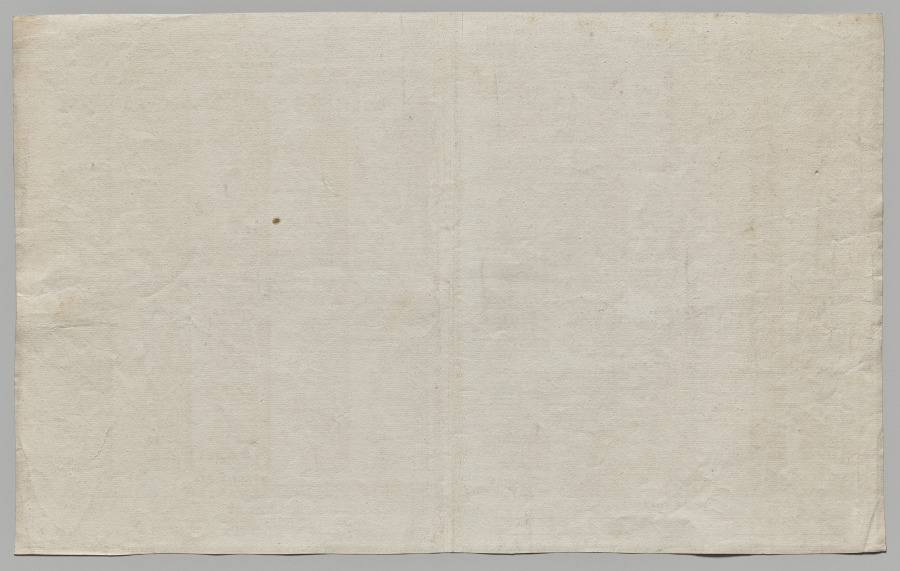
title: Nuova pianta di Roma data in luce da Giambattista Nolli l’anno MDCCXLVII, known as La Pianta Grande di Roma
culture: Italy, 18th century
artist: Giovanni Battista Nolli (Italian, 1701–1756)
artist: Carlo Nolli (Italian, 1690–1790)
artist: Rocco Pozzi (Italian, 1701–1774)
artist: Pietro Campana de Soriano (Italian, 1725–c. 1779)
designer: Stefano Pozzi (Italian, 1699–1768)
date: 1748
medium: etching and engraving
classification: Print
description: The monumental Pianta Grande di Roma, or Large Plan of Rome, which measures about 5 x 7 feet when its twelve plates are assembled, is a landmark in both cartography and printmaking. The map is considered the first scientific rendering of Rome, establishing new standards of accuracy and thoroughness when it was published in 1748. Devised by the Lombard architect and surveyor Giovanni Battista Nolli (Italian, 1701-56), the creation of the map required over ten years of surveying the city carried out by Nolli and a team of assistants with the help of new measuring devices. In Nolli’s “ichnographic” (also called “ground”) plan, architectural features and the urban infrastructure are reduced to a single horizontal slice, a minutely detailed footprint that conveys dimensions, proportions, and orientations to scale with the utmost clarity.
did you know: To make this map, Pope Clement XII granted the mapmaker permission to measure courtyards and other interior, inaccessible spaces in monastic communities, even those in nuns’ convents, which was controversial at the time.